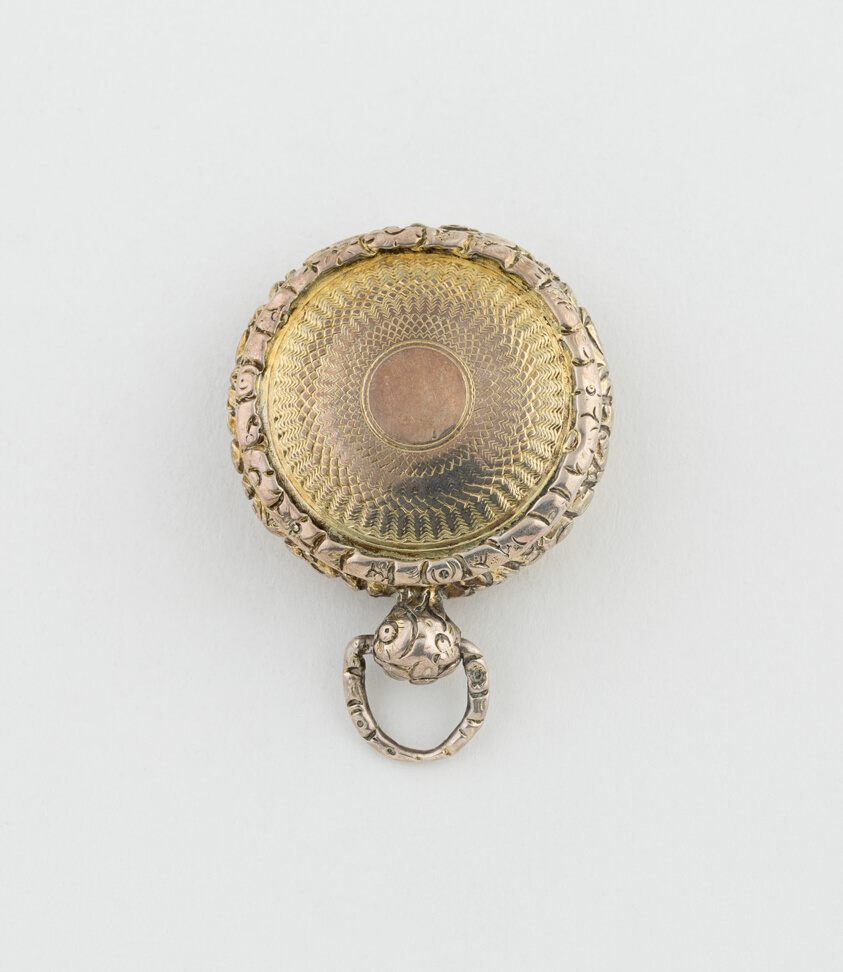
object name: Metalwork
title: Watch-Shaped Vinaigrette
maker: Joseph Willmore; Birmingham, England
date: 1831/32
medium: Silver and silver gilt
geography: Birmingham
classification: container for personal use; vinaigrette (container for health care); european decorative arts; metalwork; silver; decorative object/ornament